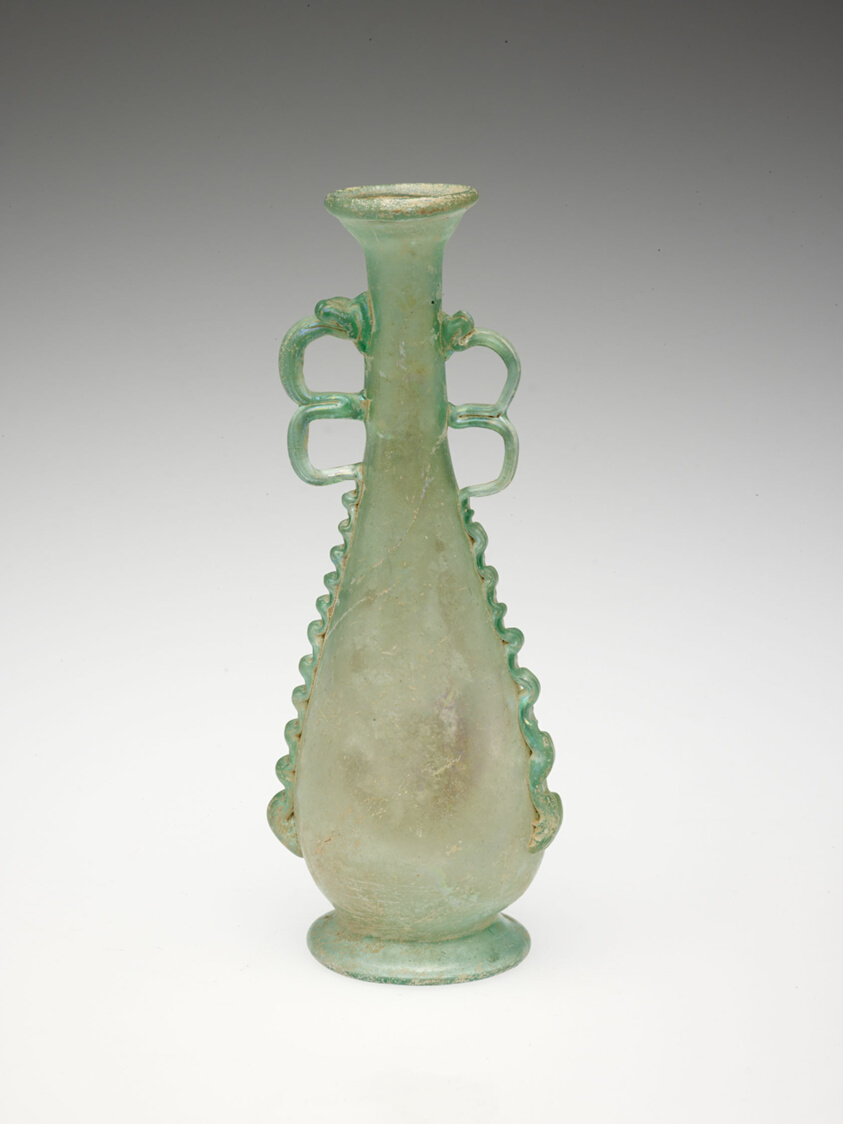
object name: Vessel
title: Flask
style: syrian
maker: Byzantine; Eastern Mediterranean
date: 5th-6th century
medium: Glass, blown technique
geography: Syria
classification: vessel; glass; ancient art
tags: containers, beauty